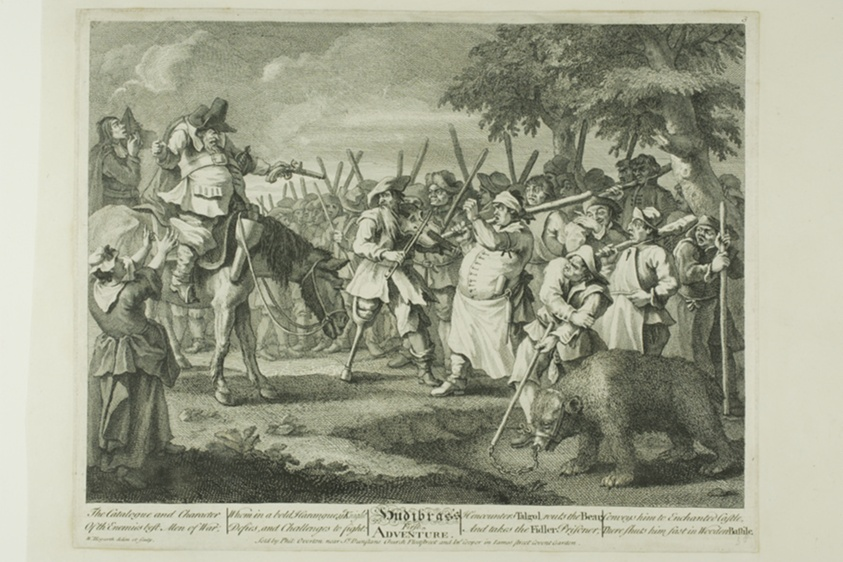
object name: Print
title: Hudibras' First Adventure, plate three from Hudibras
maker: William Hogarth (English, 1697-1764)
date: February 1725/26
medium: Etching and engraving in black on cream paper edge mounted on cream wove paper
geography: England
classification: engraving; prints and drawing; print; etching